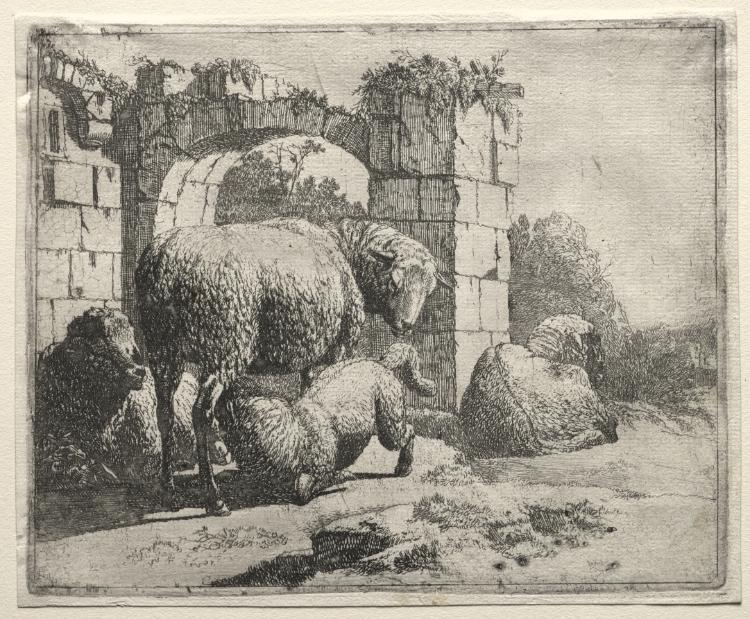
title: Sheep Near the Ruins of an Arch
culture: Germany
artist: Johann Heinrich Roos (German, 1631–1685)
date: 1665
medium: etching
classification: Print